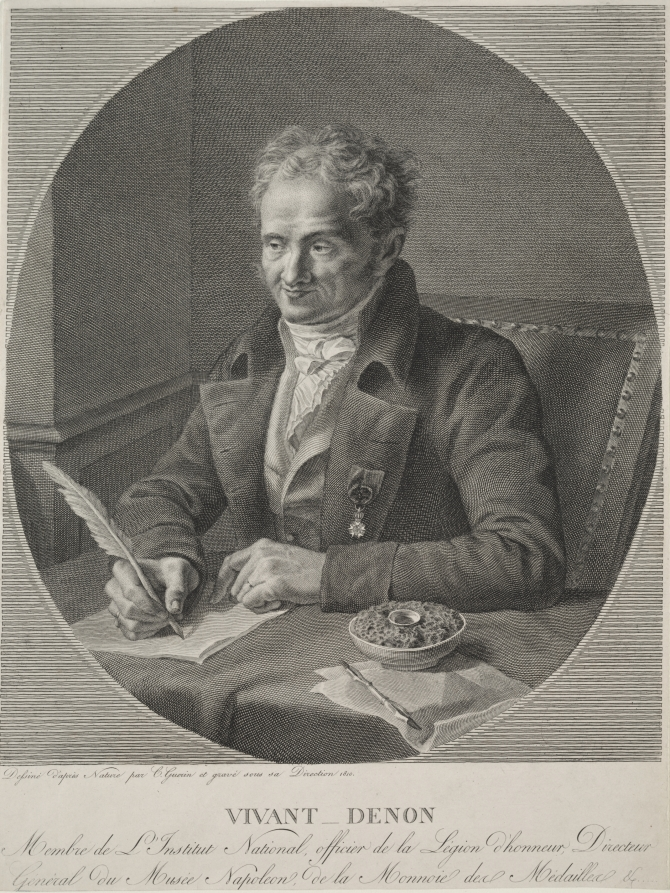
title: Dominique Vivant-Denon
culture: France, 19th century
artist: Christophe Guerin (French, 1758–1831)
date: 1810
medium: engraving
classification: Print